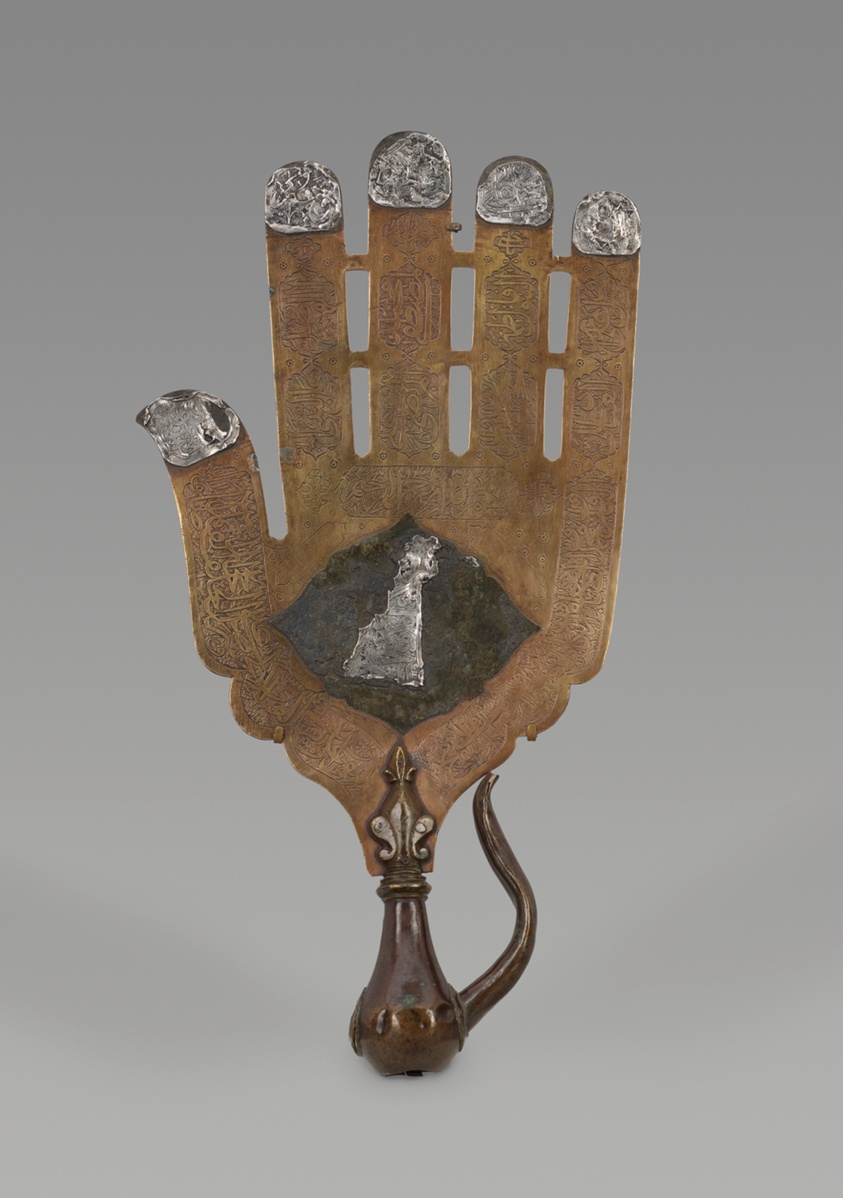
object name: Religious/Ritual Object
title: Khamsa Standard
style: Islamic (culture or style)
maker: Iran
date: Qajar dynasty (1789-1925), c. early 19th century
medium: Brass, with silver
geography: Iran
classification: brass; metalwork; asian art; ritual objects